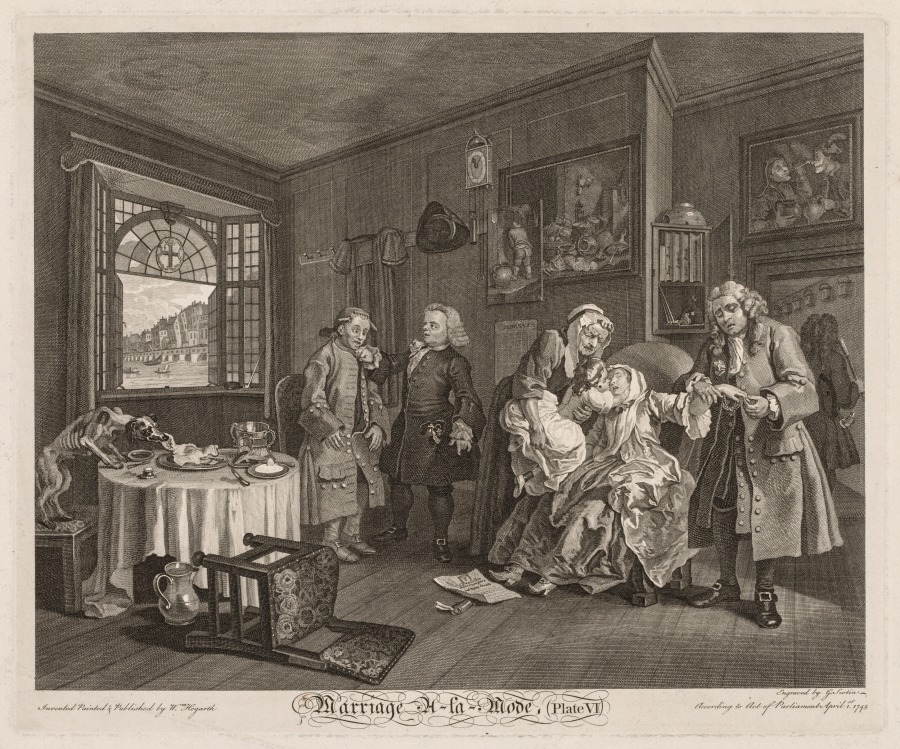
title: Marriage à la Mode: The Death of the Countess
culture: England, 18th century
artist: William Hogarth (British, 1697–1764)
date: 1745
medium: engraving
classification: Portfolio